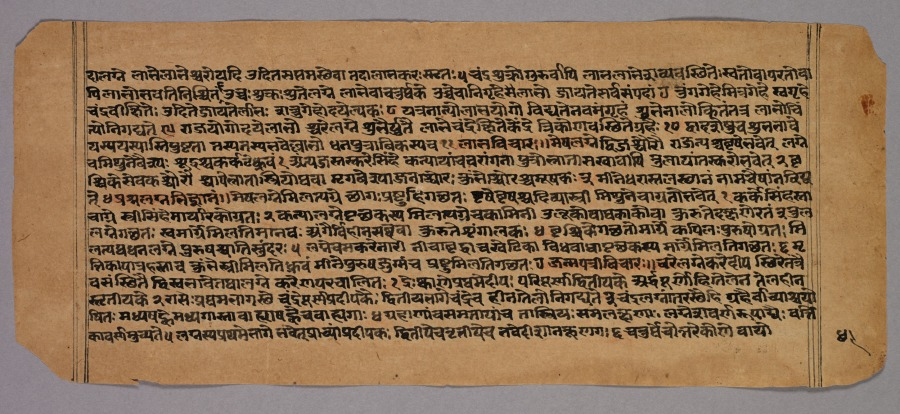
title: Page from the Prasnapradipa, a Hindu Astrology Text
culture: Western India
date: 1500s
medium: ink on paper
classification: Manuscript